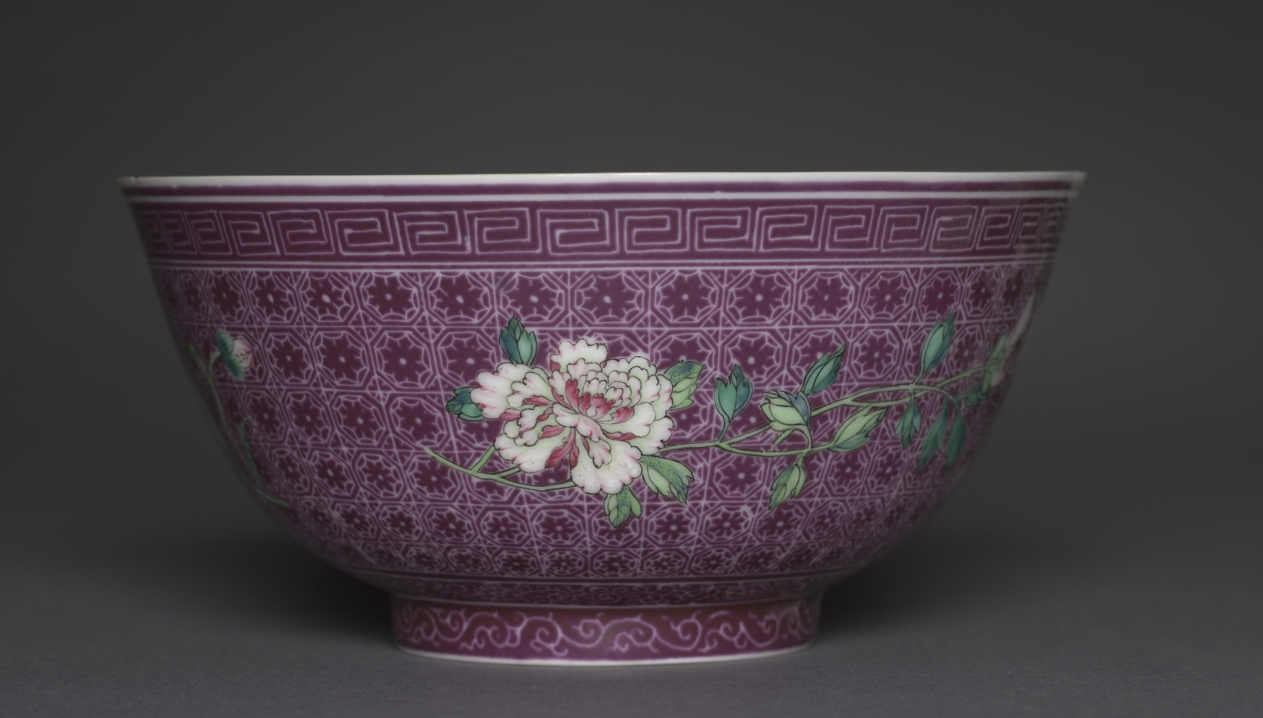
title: Bowl with Peony Sprays on Diaper Ground (exterior); Chrysanthemum Sprays (interior)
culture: China, Jiangxi Province, Jingdezhen, Qing dynasty (1644–1911), Qianlong mark and reign (1736–95)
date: 1736–95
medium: porcelain with famille rose overglaze enamel decoration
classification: Ceramic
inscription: 乾隆年製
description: The production of extraordinarily refined Qing imperial wares such as these could have involved the transportation of undecorated, plain porcelains from the imperial kilns in Jingdezhen, Jiangxi province, to the palace workshops in Beijing, where court painters applied the polychrome enamel decoration. The Qianlong reign mark on the base of the bowl is written with blue enamel over the transparent glaze.